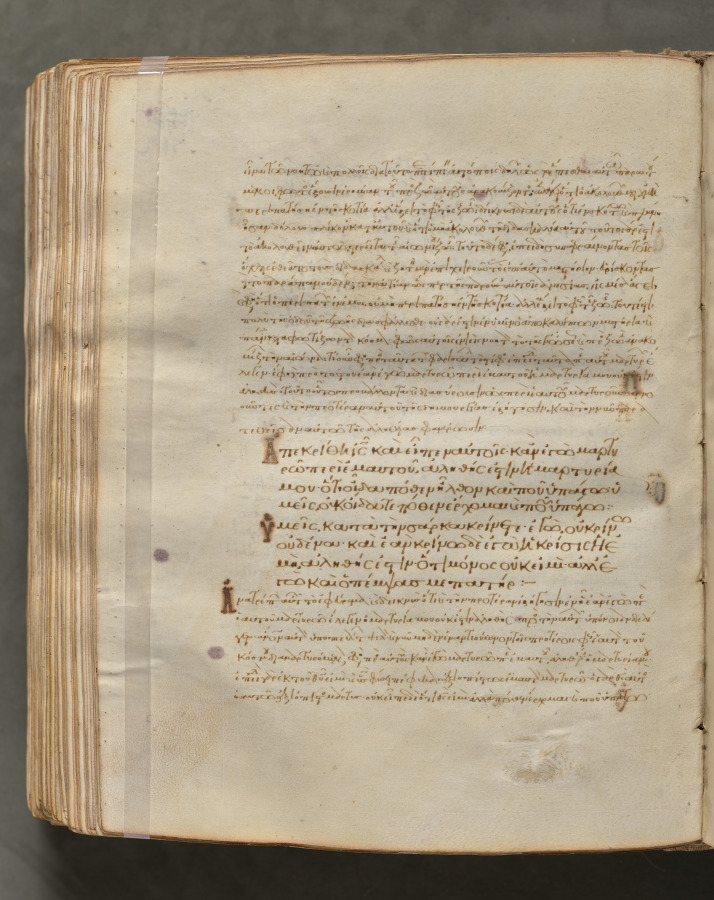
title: Text, folio 362 (verso), from a Gospel Book with Commentaries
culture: Byzantium, Constantinople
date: c. 1000–1100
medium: ink, tempera, and gold on vellum; leather binding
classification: Bound Volume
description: Each of the four gospels in this book opens on a page with brilliantly illuminated borders depicting the author of the text as well as birds—principally peacocks, symbols of the immortality of the soul—and fountains, representing the fountain of life and the salvation of the soul. This volume consists of 428 leaves with texts in Greek. Its level of sophistication suggests that it was probably written and decorated in a monastery in Constantinople.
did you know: Gospel books were carried in procession through Byzantine churches.